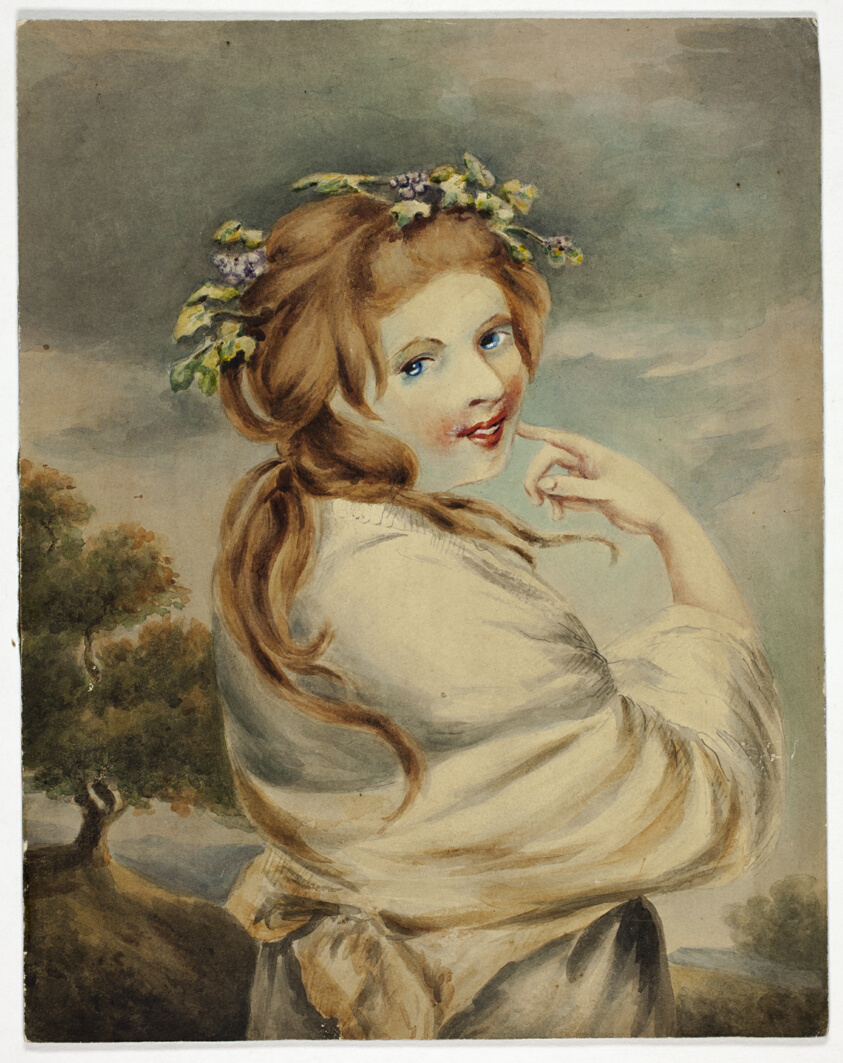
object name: Drawing and Watercolor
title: Lady Hamilton as Nature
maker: After George Romney; English, 1734-1802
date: 1800/1850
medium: Watercolor, over graphite, on board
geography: England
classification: watercolor; drawings (visual works); prints and drawing